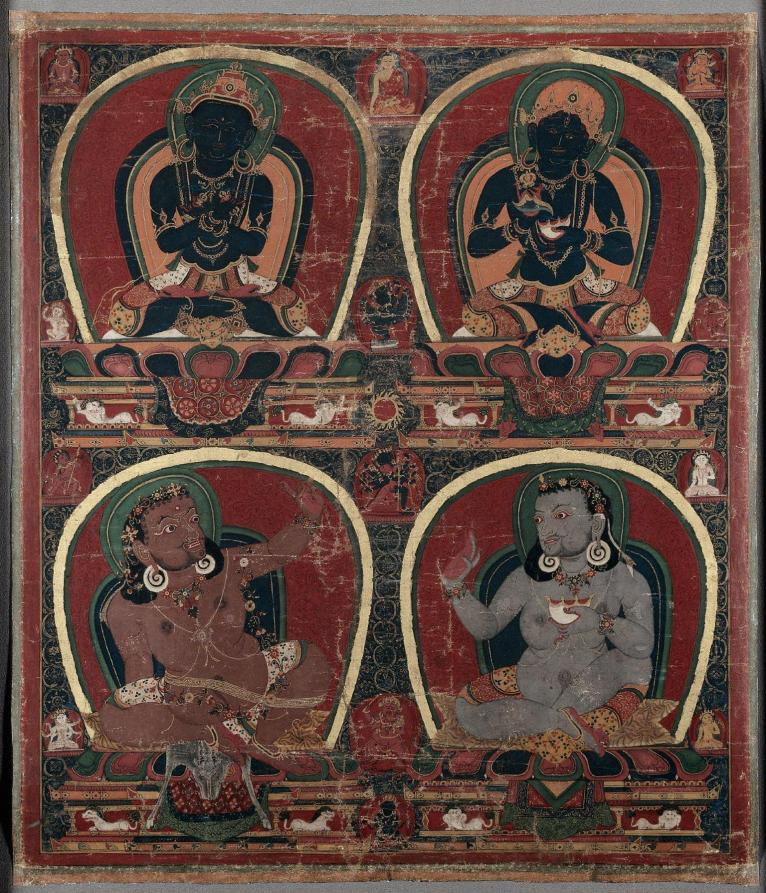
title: Vajradhara, Nairatmya, and mahasiddhas Virupa and Kanha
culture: Central Tibet, Ngor monastery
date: c. 1450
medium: Gum tempera and gold on cotton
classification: Painting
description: The first in a series depicting the masters who transmitted the teachings on how to reach enlightenment, this painting begins at the upper left with the dark blue Vajradhara, who represents the essence of all Buddhas. The female enlightened being Nairatmya is seated at the upper right. She transmitted the teachings to Virupa, the brown-skinned Indian yogi at the lower left, in a vision; his disciple Kanha is at the lower right.